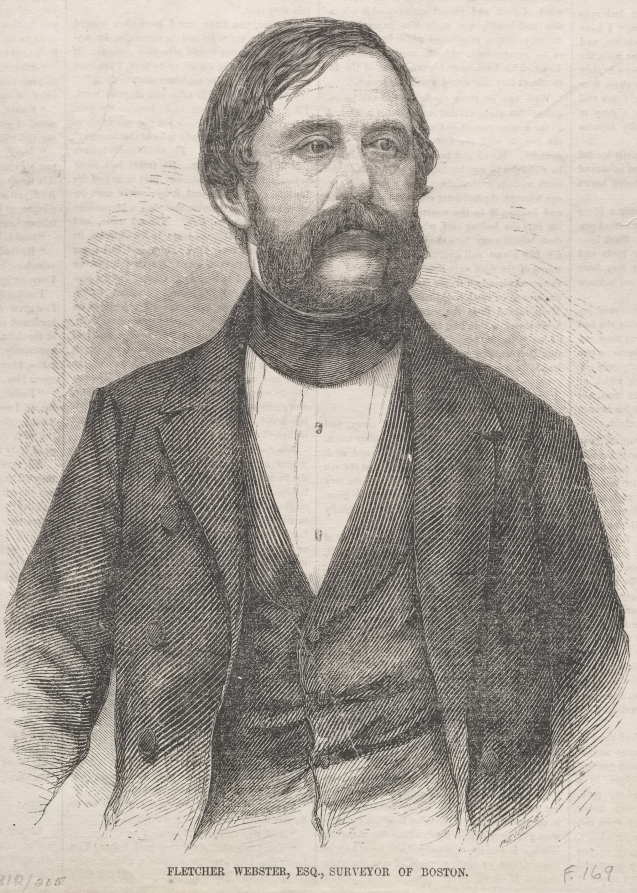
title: Fletcher Webster, Esq., Surveyor of Boston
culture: America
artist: Winslow Homer (American, 1836–1910)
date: 1859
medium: wood engraving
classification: Print